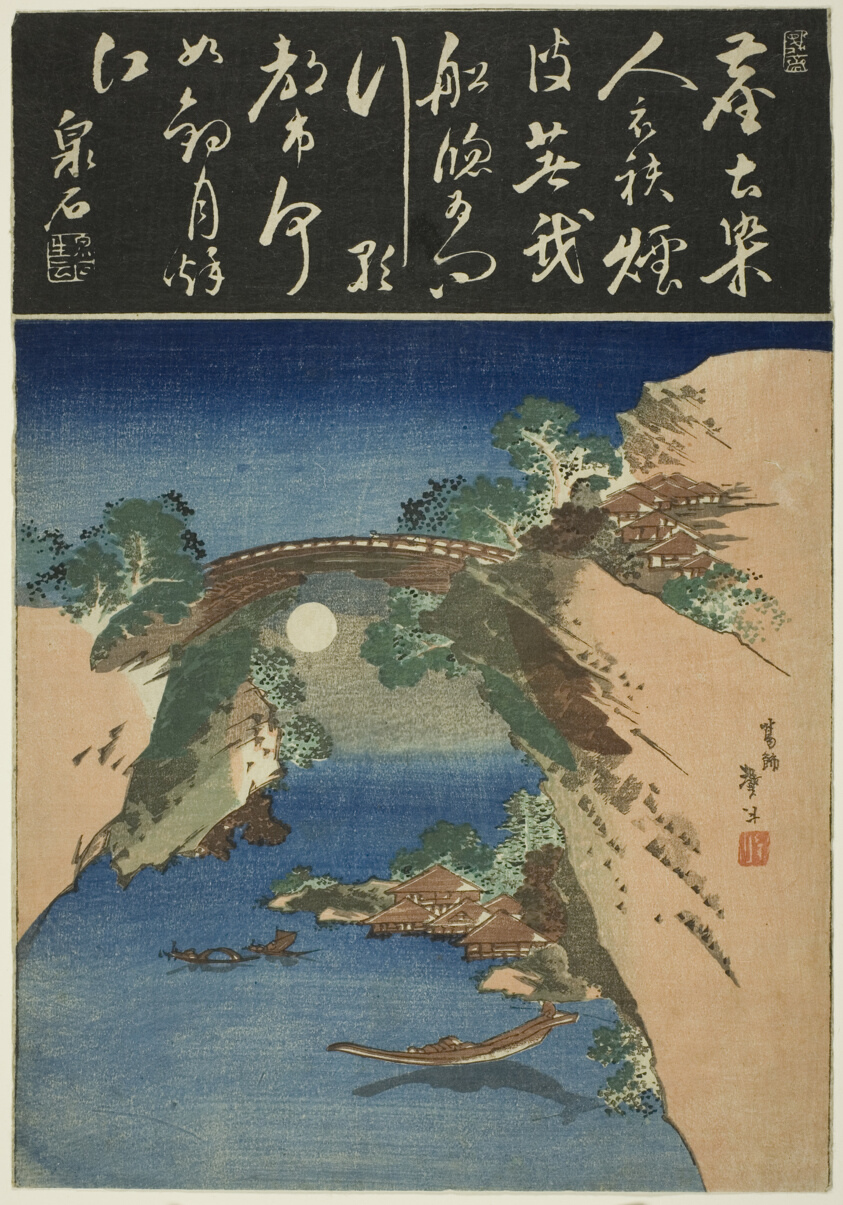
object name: Print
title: Monkey bridge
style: Japanese (culture or style)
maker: Katsushika Taito II (Japanese, active c. 1810-53)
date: c. 1830/44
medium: Color woodblock print; oban, harimaze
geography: Japan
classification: woodblock print; print; asian art